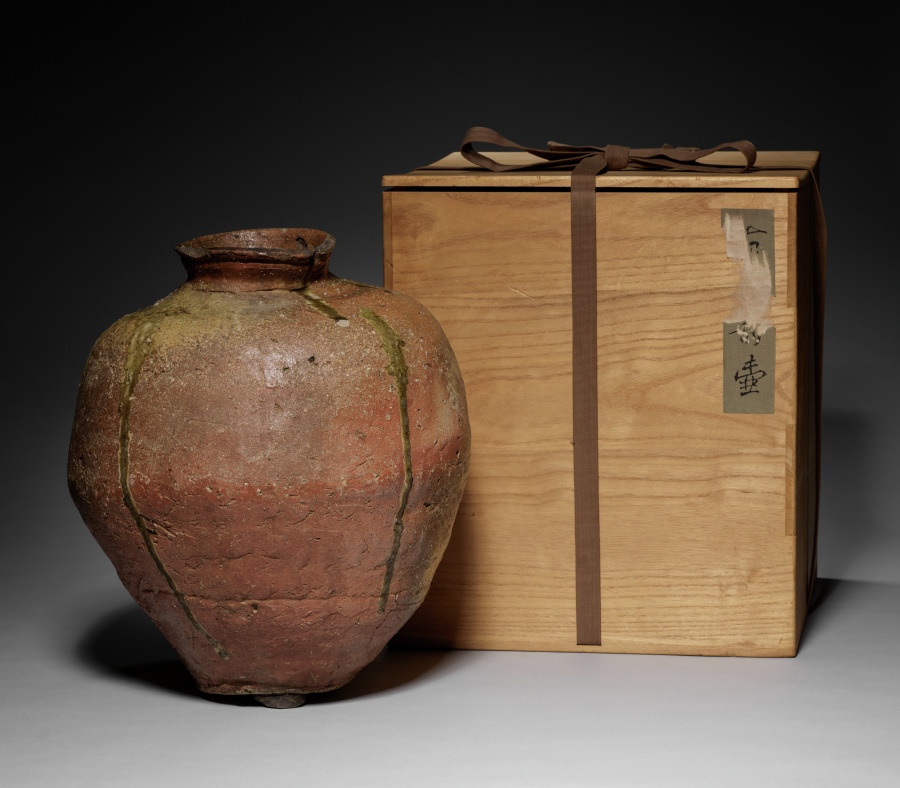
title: Large Jar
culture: Japan, Muromachi period (1392–1573)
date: 1400s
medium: stoneware with natural ash glaze (Shigaraki ware)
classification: Ceramic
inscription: Box inscription (front): 「不明」壺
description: The orange color of this jar comes from iron in the clay. Natural ash glaze settled on the vessel during firing. Originally intended for grain storage, rustic containers like this one were also prized by tea enthusiasts, who appreciated the uncalculated beauty of the glaze and the asymmetry of these humble objects. They used them to store tea leaves.